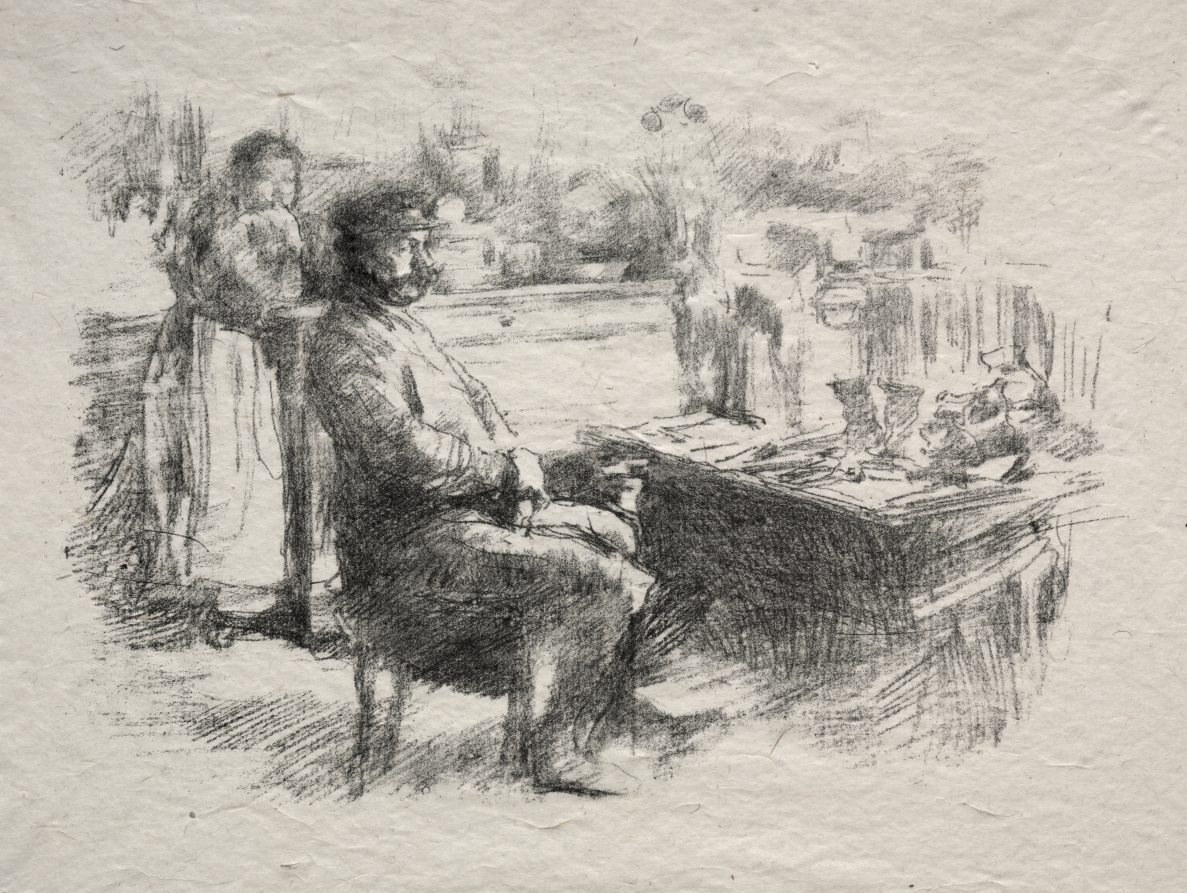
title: The Shoemaker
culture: America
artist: James McNeill Whistler (American, 1834–1903)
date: 1896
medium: lithograph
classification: Print